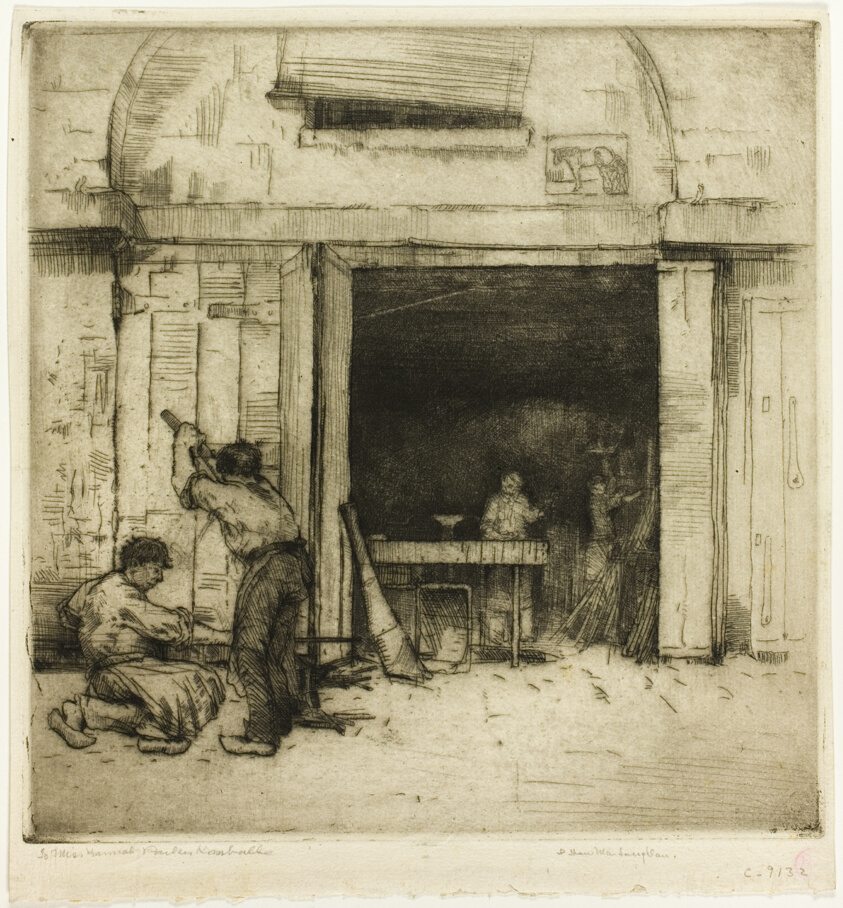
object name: Print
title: The Coppersmiths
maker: Donald Shaw MacLaughlan (American, born Canada, 1876-1938)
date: 1900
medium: Etching in black on cream laid paper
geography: United States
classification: etching; print; prints and drawing